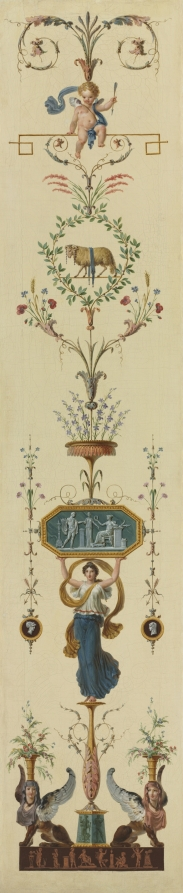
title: Decorative Panel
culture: France, 18th century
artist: Pierre Rousseau (French, 1751–1829)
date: 1790s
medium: oil on canvas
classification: Painting